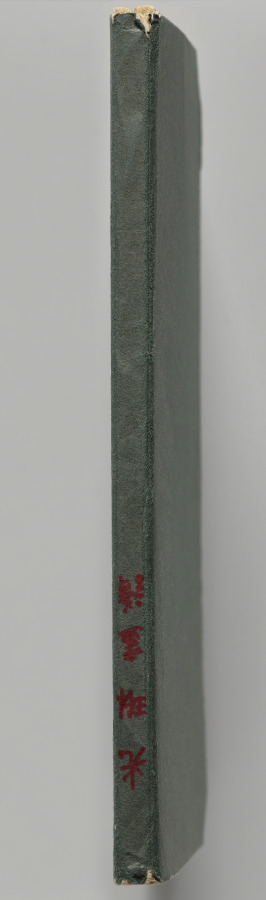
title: The Kōrin Picture Book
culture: Japan, Edo period (1615–1868)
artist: Nakamura Hōchū (Japanese, d. 1819)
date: 1800s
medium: Set of two woodblock printed folding-books; ink and color on paper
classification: Bound Volume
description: Nakamura Hōchū prized the design acumen of earlier painter Ogata Kōrin (1658–1716) and honored him with this two-volume set of woodblock printed images. While Hōchū sampled the original compositions from Kōrin’s works, the prints in these books are heavily inflected with his own loose, whimsical drawing style.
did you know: This set of books is in the orihon, or folding-book format.